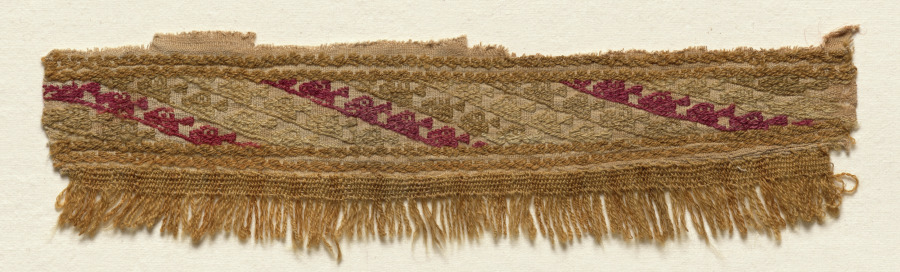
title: Three Border Fragments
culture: Peru, Central Coast, Chancay, 12th-15th century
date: c. 1100–1400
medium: tabby, brocaded; cotton and wool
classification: Textile